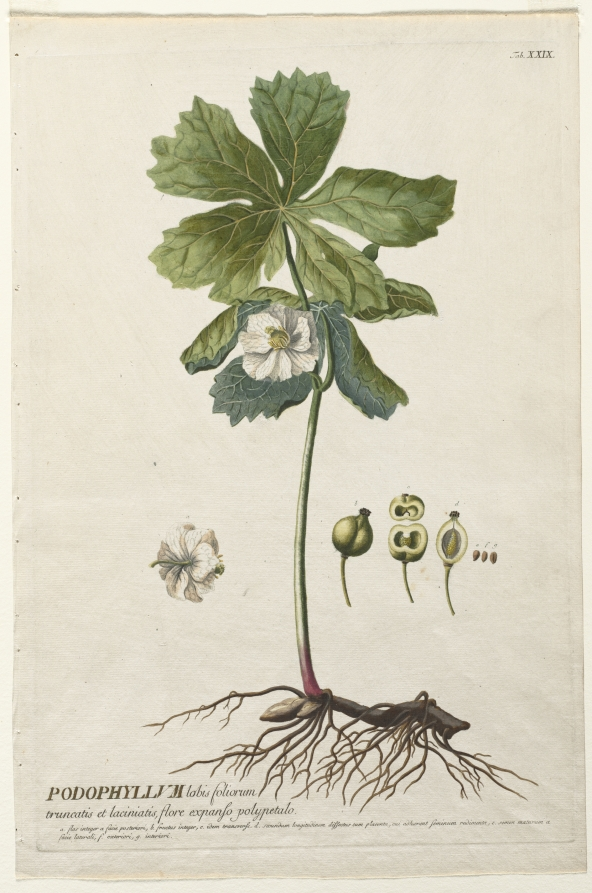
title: Plantae Selectae: No. 29 - American May Apple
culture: Germany, 18th century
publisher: Christopher Jacob Trew (German, 1695–1769)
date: published 1750–73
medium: engraving, hand-colored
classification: Print